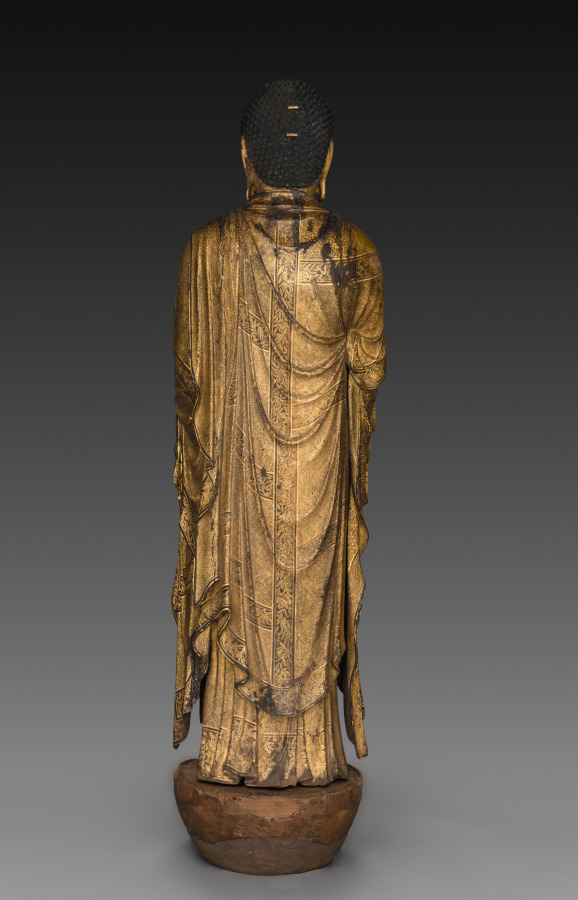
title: Buddha of Infinite Life and Light (Amida Nyorai)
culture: Japan, Kamakura period (1185–1333)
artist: Kōshun (Japanese, active mid-1200s)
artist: assisted by Koshin (Japanese, active mid-1200s)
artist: assisted by Joshun (Japanese, active mid-1200s)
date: 1269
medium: Cypress with lacquer, color, gold, cut gold, rock-crystal inlaid eyes, and quartz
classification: Sculpture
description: This ornate Buddha Amida stands in a posture of welcome, greeting the dying who will accompany him back to his Pure Land. Documents inserted into the sculpture’s hollow core around the time of its creation include a copy of the sacred text Amida Sutra, a register of donors who desired to be joined together in generating karmic merit (kechien) through the creation and dedication of the sculpture, and a record asserting that the image was completed over the course of 33 days in 1269 at Shitennōji Temple in Osaka.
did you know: The lead sculptor was Kōshun, who had been granted the lofty title “Bridge of the Law.”